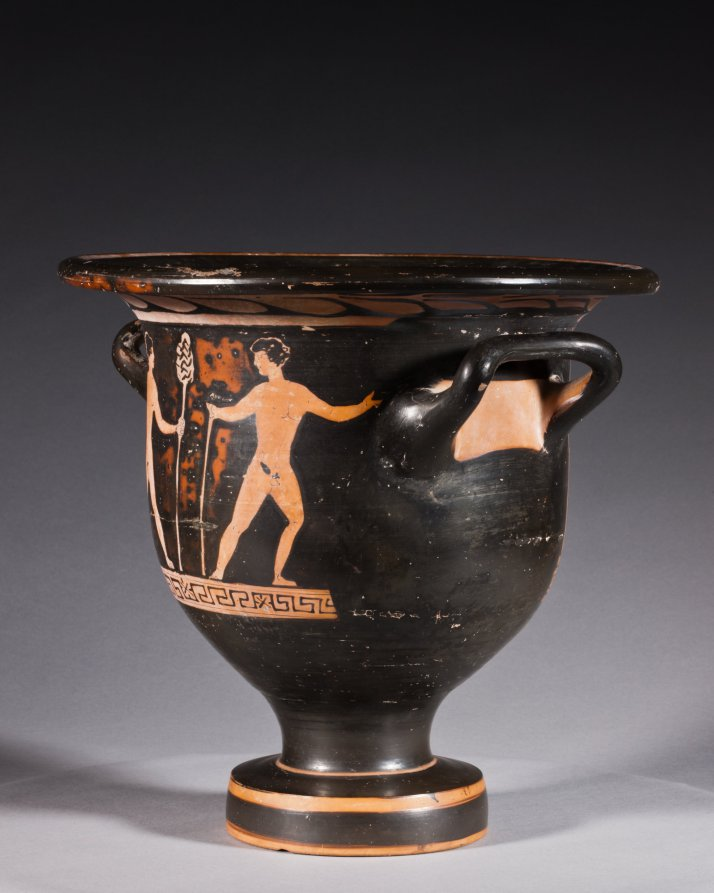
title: Red-Figure Bell Krater (Mixing Vessel): Aphrodite and Eros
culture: South Italian, Apulian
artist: attributed to Graz Painter (South Italian, Apulian, active c. 380–360 BCE)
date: c. 370–360 BCE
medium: ceramic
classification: Ceramic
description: This small mixing vessel shows a finely dressed woman seated on a chest and holding up a mirror to admire herself. Before her stands Eros, the winged god of love, holding a ribbon or sash. Behind the woman stands a pillar with the inscription ΑΦΡΟΔΙΤΗ, or APHRODITE, the goddess of love. Such labels are rare on vases, and scholars debate whether this names the woman shown as Aphrodite herself, with her son Eros, or a bride envisioning herself as Aphrodite, just before her wedding.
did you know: The dancing nude youths on the reverse are unusual; typically they would be standing and draped.